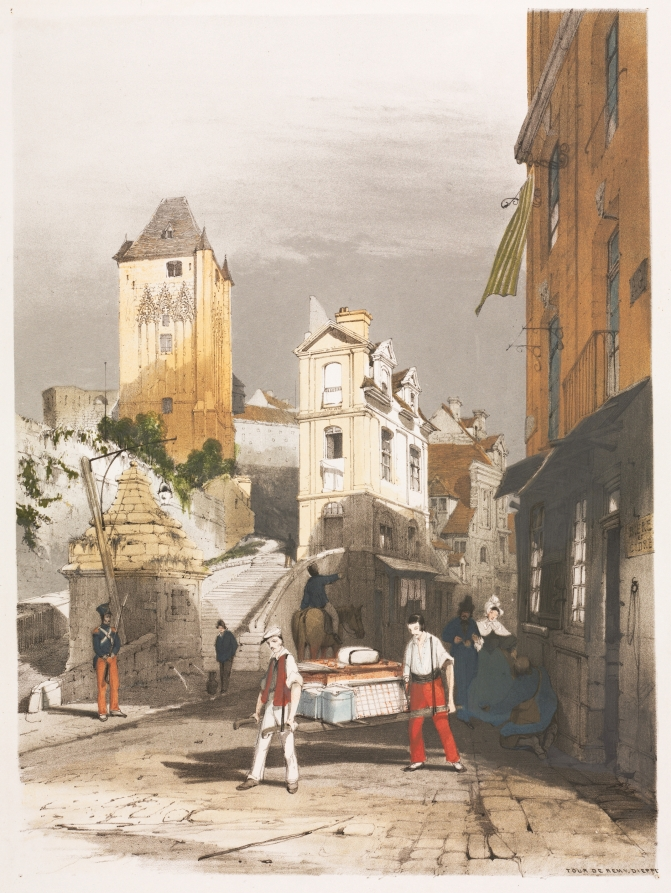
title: Picturesque Architecture in Paris, Ghent, Antwerp, Rouen, Etc.: Tour de Remy, Dieppe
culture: England, 19th century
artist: Thomas Shotter Boys (British, 1803–1874)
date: 1839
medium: color lithograph with hand coloring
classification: Print